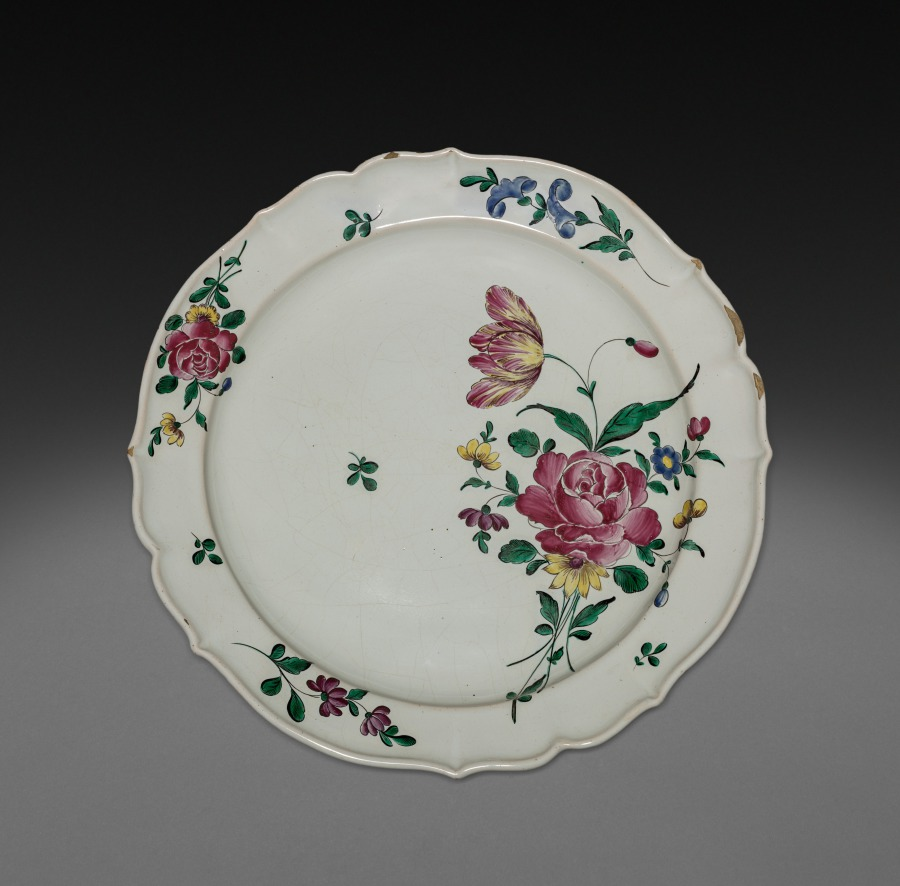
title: Plate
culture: France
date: c. 1750–70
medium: faience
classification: Ceramic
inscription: Tag on the back of plate reads "Meillones c. 1765"